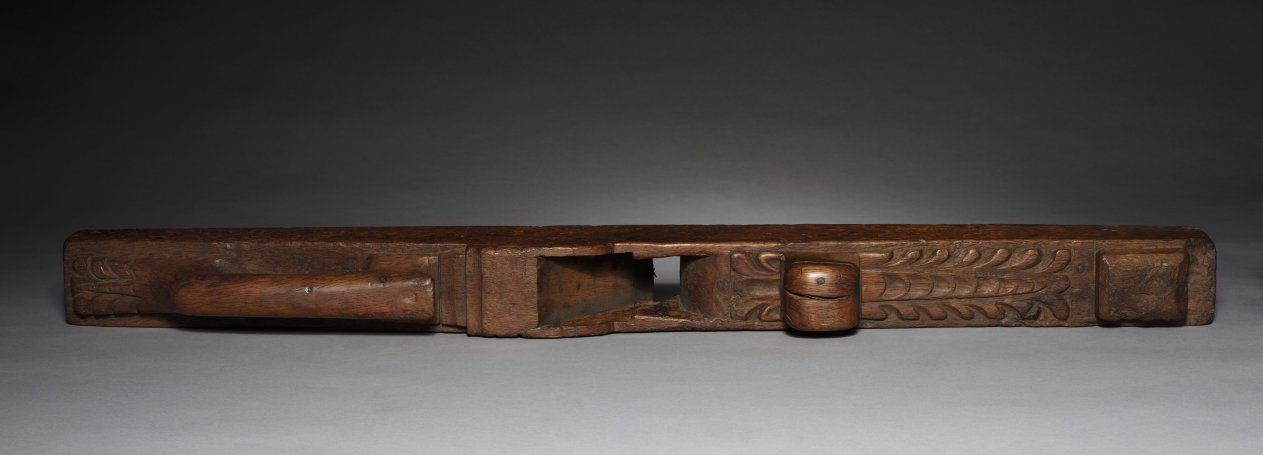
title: Plane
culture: France, 17th century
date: 1600s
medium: wood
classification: Tool